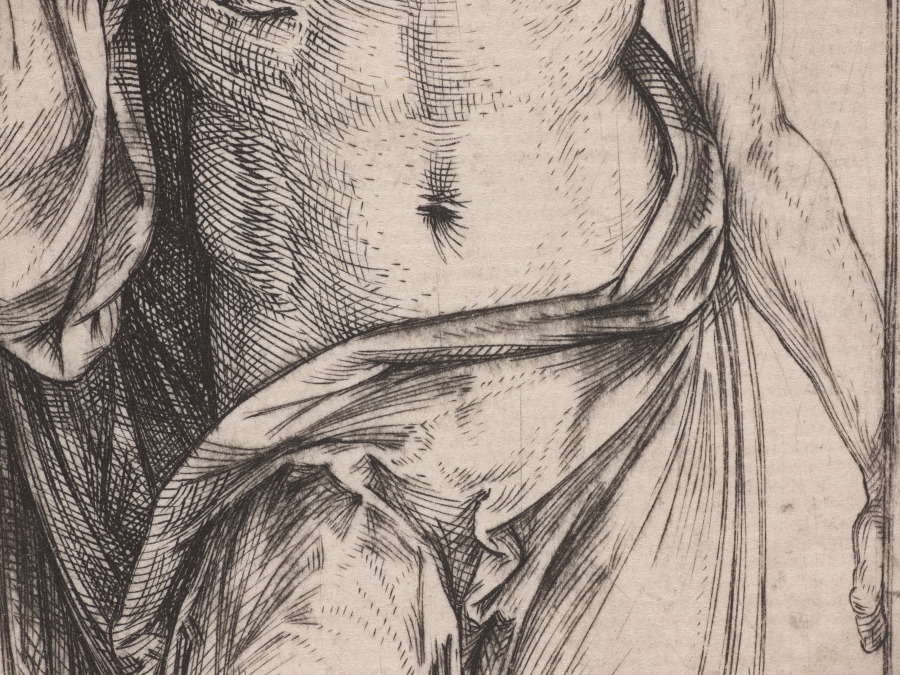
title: The Risen Christ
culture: Italy, 16th century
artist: Jacopo de' Barbari (Italian, c. 1460/70–c. 1516)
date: c. 1503–1504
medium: engraving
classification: Print